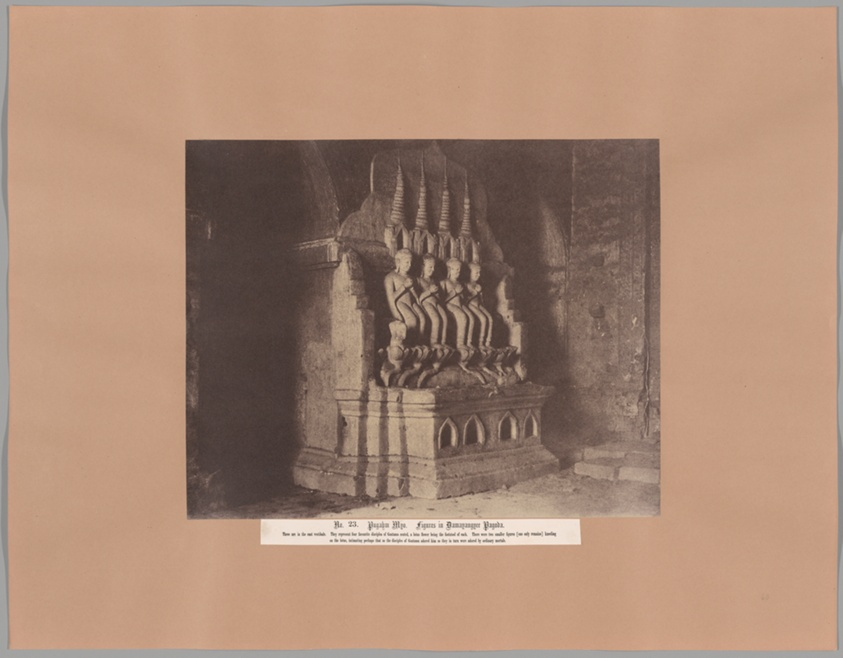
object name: Photograph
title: No. 23. Pugahm Myo [Pagan]. Figures in Damayangyee Pagoda [Dhamma-yan-gyi].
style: 19th century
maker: Linnaeus Tripe (English, 1822–1902)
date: 1855, printed 1856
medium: Salted paper print, from the album "Burma Views" (1857)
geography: England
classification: photograph; photography